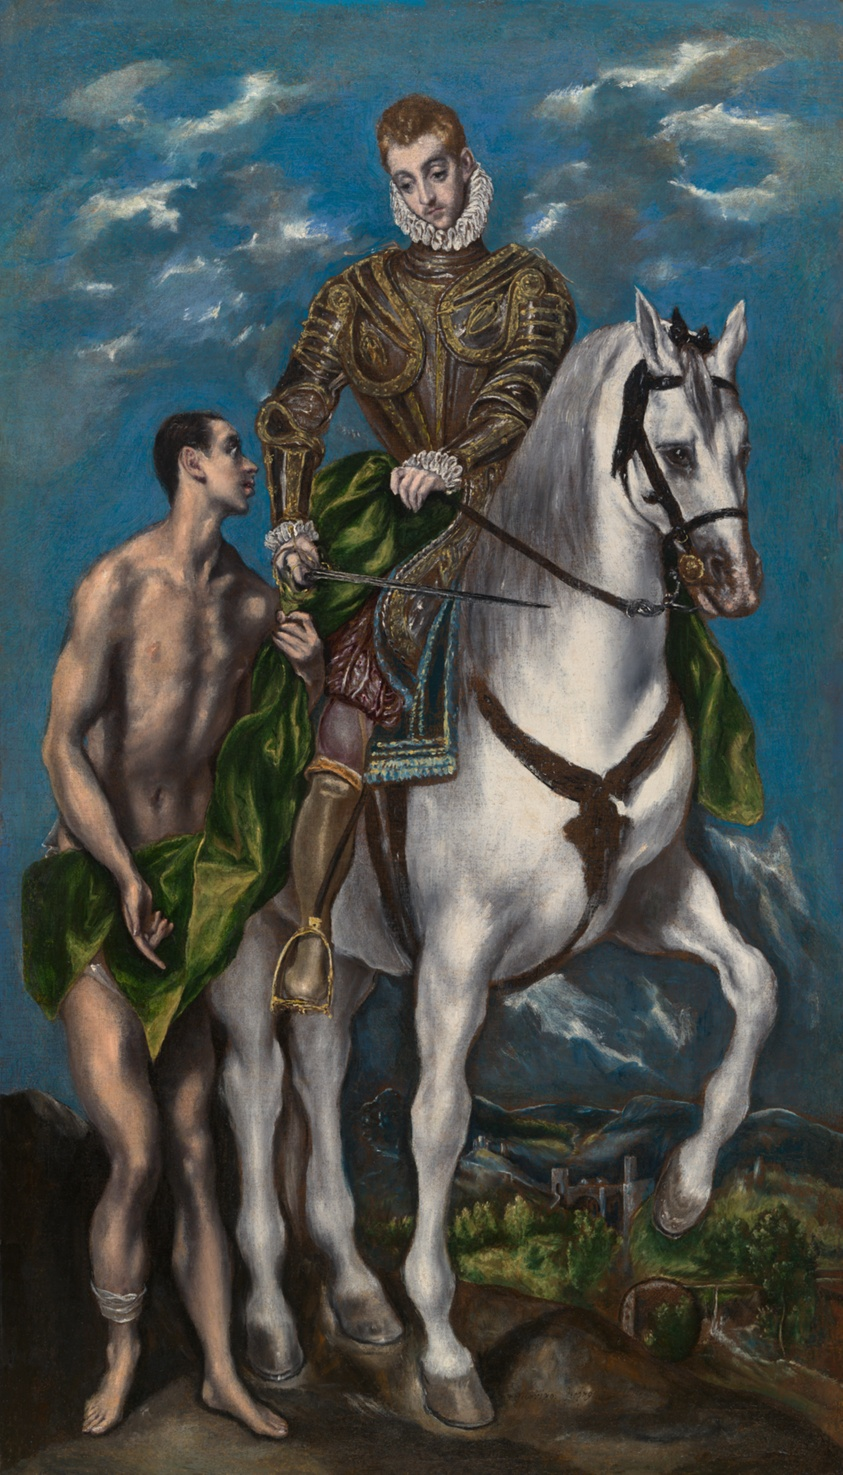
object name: Painting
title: Saint Martin and the Beggar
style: Mannerism, sixteenth century, Renaissance, 16th Century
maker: El Greco (Doménikos Theotokópoulos; Greek, active in Spain, 1541–1614)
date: c. 1597–c. 1600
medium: Oil on canvas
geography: Greece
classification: painting; paint; oil paintings (visual works); oil on canvas; european painting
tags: saints, man, peasants, soldiers, cloth, green (color), horse, animals, armor, landscape, religion, religious, religious figures, religious scenes, Christian subjects, Christianity, Devotion, Spain, Century of Progress, world's fairs, Chicago World's Fairs